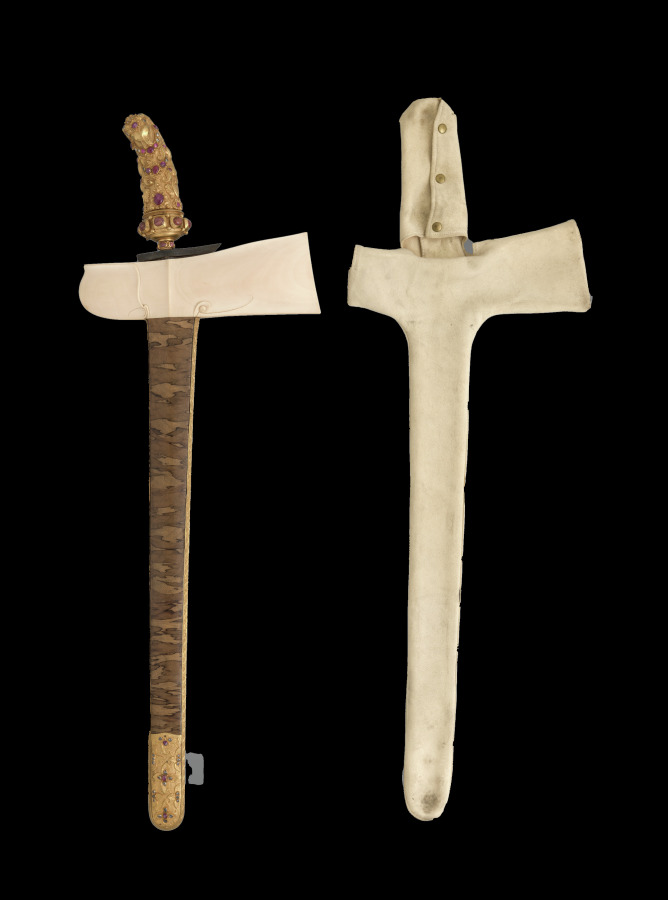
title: Kris and Scabbard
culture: Indonesia, Bali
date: 1800s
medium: metal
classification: Arms and Armor